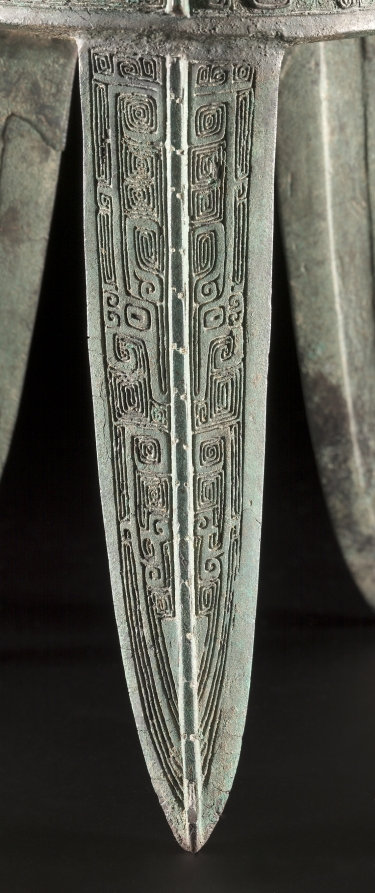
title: Wine Vessel (Jia)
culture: China, Shang dynasty (c. 1600–c. 1046 BCE), Anyang phase (c. 1250–1046 BCE)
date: c. 1250–1046 BCE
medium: bronze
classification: Metalwork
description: This large wine vessel (or jia) is among those very rare, monumental pieces uncovered from Anyang, the last royal capital of the Shang dynasty (c.1700–c.1100 BCE). Probably very few monumental bronze vessels were ever made; each of them must have cost a fortune and was used to designate high-ranking (often royal) status. Even fewer have survived. This wine vessel was used for the ancestral rites of the Shang. Its three splayed legs supported the cup over a fire, suggesting that the wine might be heated. Offering wine and food to their departed ancestors was an essential ritual practice performed by the Shang royalty and aristocracy. The Shang people believed that their ancestors were able to intercede with the high god to confer fruitful harvests and victories in battles. Their ritual actions involved communication with the supernatural realm (and this was further supported by the practice of divination with the use of a tortoise shell or a cattle shoulder blade). Here, the animal mask on the bronze vessel stares frontally at the viewer and serves symbolically as a messenger of communication with the ancestors. It conjures up the potency of mystery, whereas the static monumentality of the bronze vessel lends an air of dignified solemnity to the ritual ceremony.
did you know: Ancient bronze vessels are ritual and religious in nature, linked inextricably to political legitimization, and are source materials for Chinese historiography and traditional antiquarianism.